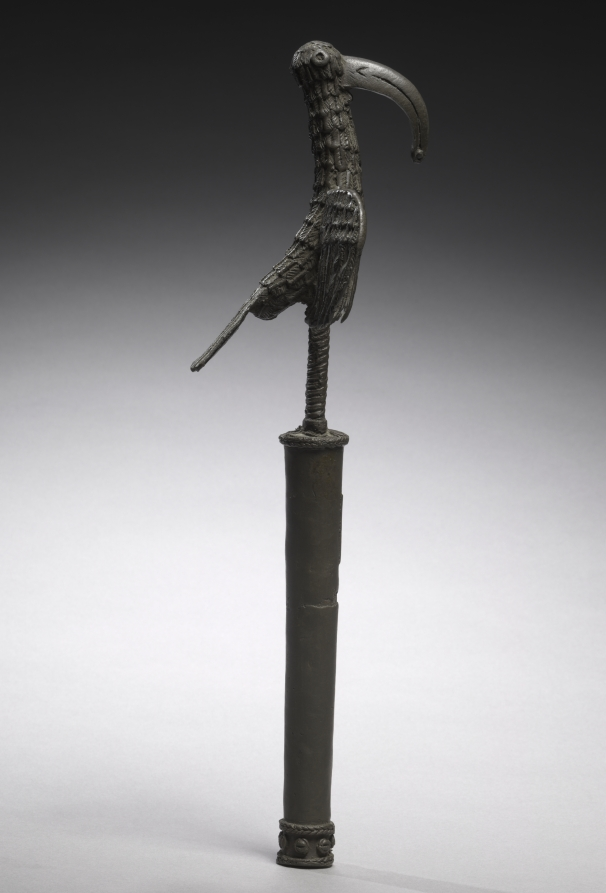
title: Idiophone/Staff (ahianmwẹn-ọrọ)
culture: Nigeria, Benin Kingdom, Ẹdo peoples, members of the Igun Eronmwon (royal brasscasters) guild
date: possibly 1800s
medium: Copper alloy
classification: Sculpture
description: Courtiers, priests, and senior chiefs strike instruments like this during the Ugie Ọrọ festival. The long-legged metal bird refers to the 16th-century ruler Ọba Ẹsigie. Wings outstretched with long, textured feathers, it is the ahianmwẹn-ọrọ (bird of prophecy). It stares outward, a likely magical substance clenched in its beak. Such a bird prophesied Ẹsigie’s defeat and death during the Idah War (about 1515–17), leading his people to resist fighting for him. When Ẹsigie triumphed, bronze bird effigies were beaten for days on end throughout the year. This punished the false avian prophet and shamed the cowardly men.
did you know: An image of the ahianmwẹn-ọrọ (bird of prophecy) once sat atop the roof of the palace in the Benin Kingdom.